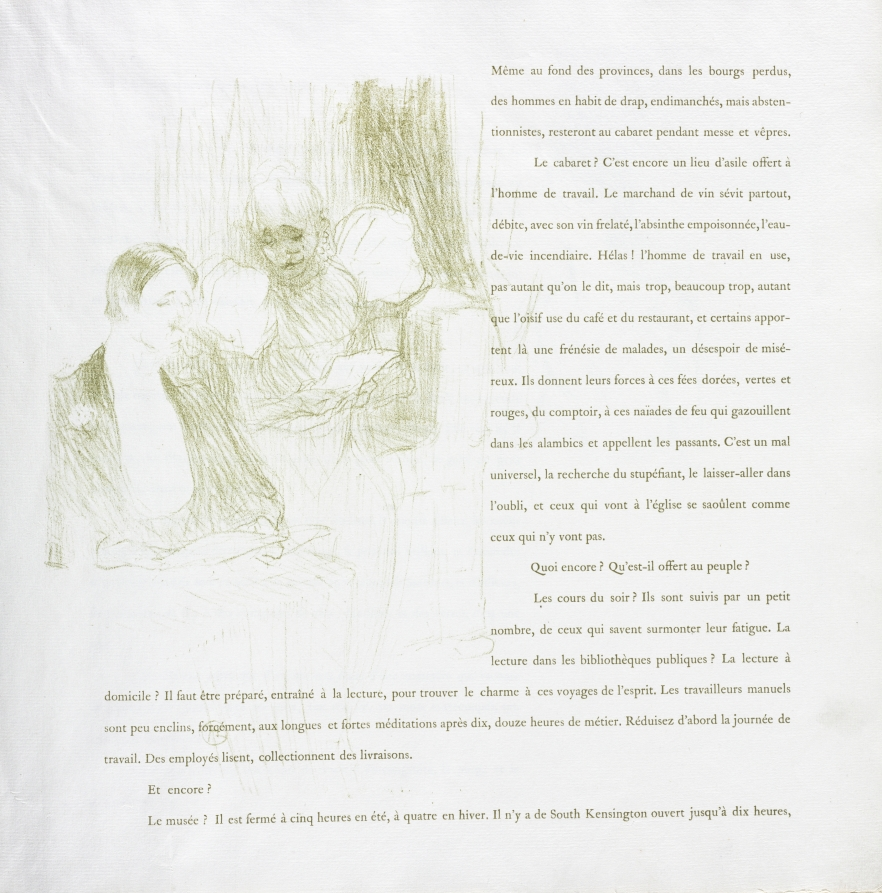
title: Yvette Guilbert-French Series: No. 8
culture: France, 19th century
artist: Henri de Toulouse-Lautrec (French, 1864–1901)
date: 1894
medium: lithograph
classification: Bound Volume